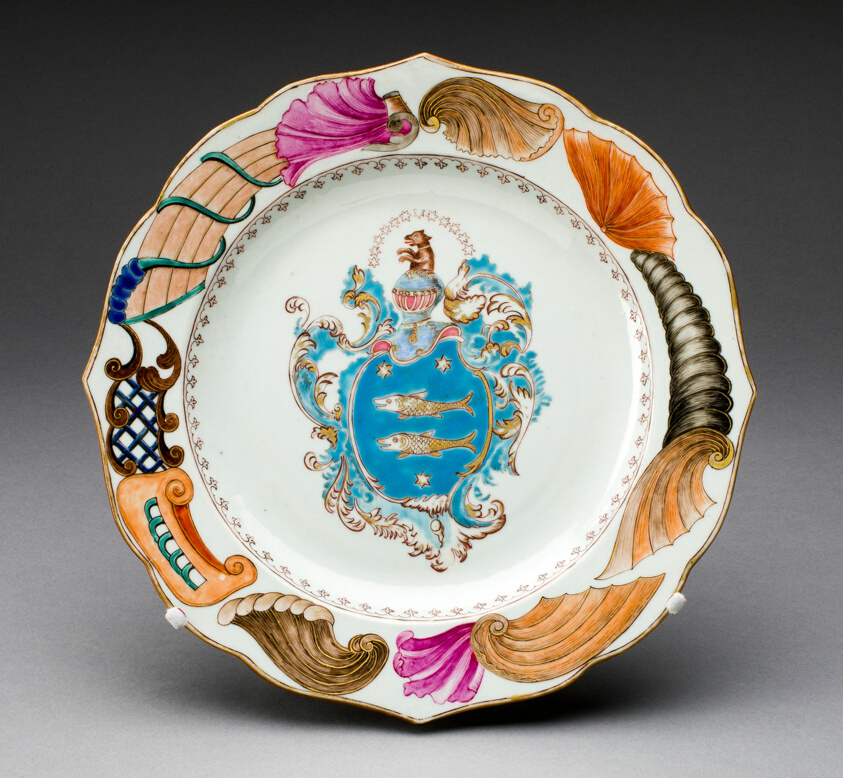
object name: Ceramics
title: Plate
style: chinese export, Chinese (culture or style), East Asian, asian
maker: China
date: c. 1723/40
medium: Hard-paste porcelain with polychrome enamels and gilding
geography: Jingdezhen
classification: plate (general, dish); dish (vessel); chinese export porcelain; porcelain; european decorative arts; ceramics